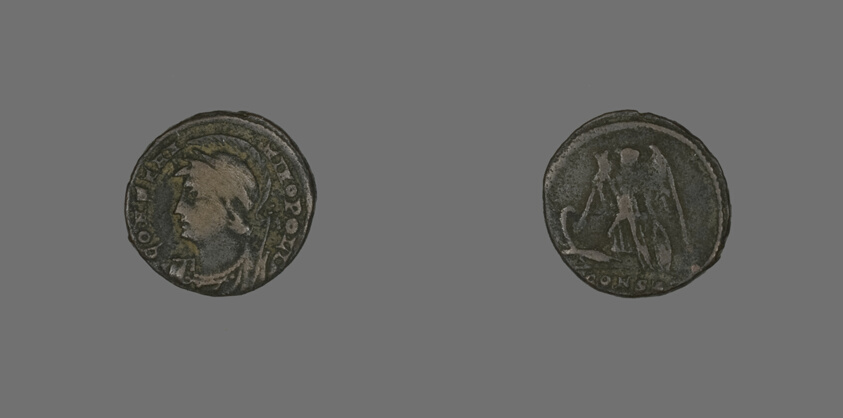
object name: Coin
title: Coin Portraying Emperor Constantine I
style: roman (ancient, style or period), ancient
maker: Roman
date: about 330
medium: Bronze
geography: Roman Empire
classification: coin; ancient art